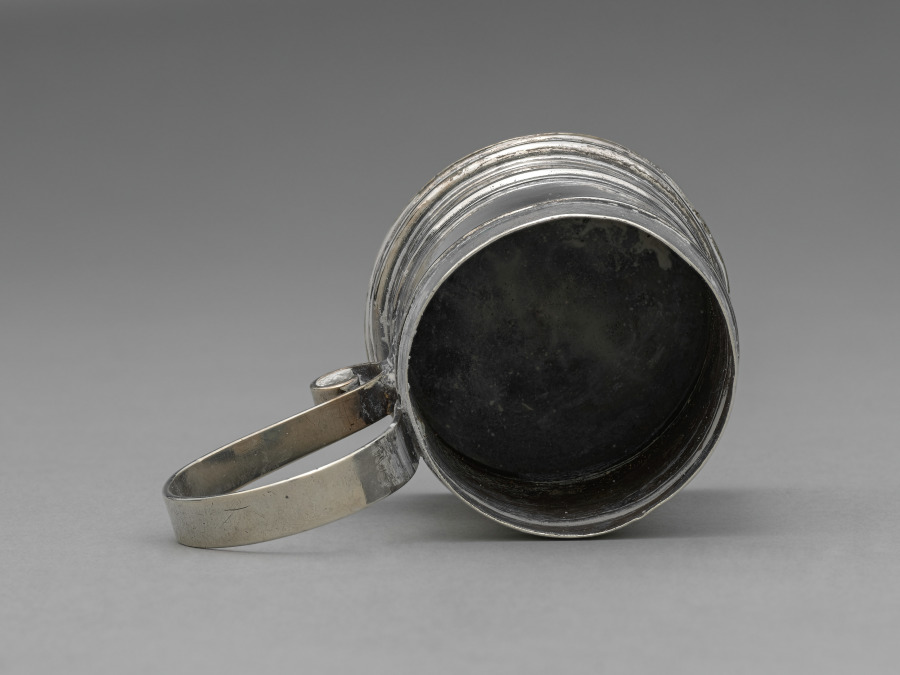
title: Caster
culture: America, Massachusetts, Boston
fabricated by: John Edwards (British)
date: c. 1715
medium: silver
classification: Silver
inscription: engraved "C" over "EE" in shaded block letters on bottom, and "FLB" (later) in bright-cut script on front, opposite handle.